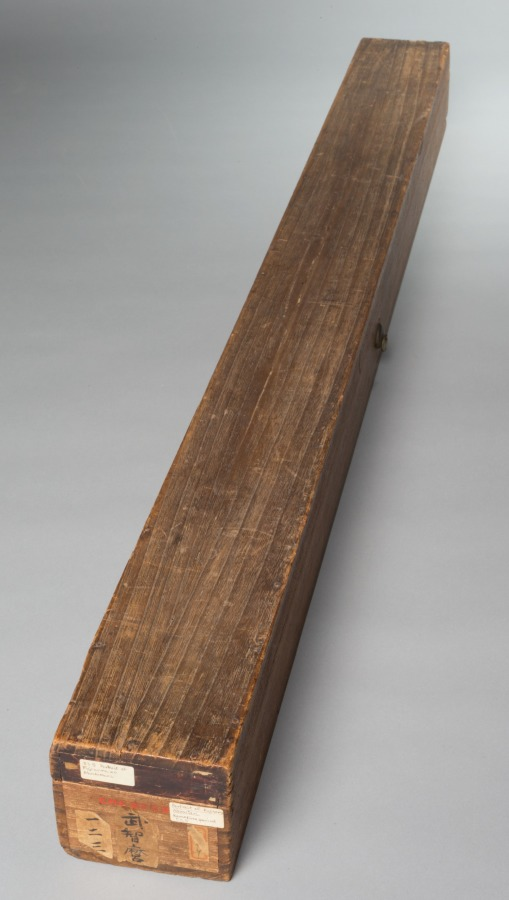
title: Fujiwara no Muchimaro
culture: Japan, Kamakura period (1185–1333)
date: 1200s or 1300s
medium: Hanging scroll; ink, color, gold, and cut gold on silk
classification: Painting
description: This portrait of Fujiwara no Muchimaro (680–737), a grandson of Fujiwara no Kamatari (614–669), includes an image of Buddha Dainichi Nyorai above his head. By situating the image of Dainichi there, this painting would seem to assert that Muchimaro is an avatar of Dainichi. In the same way that kami could be identified with Buddhist counterparts, powerful humans could also be seen as manifestations of Buddhist deities. A similar painting is at Eizanji in Nara, of which Muchimaro is known as the founder. It was once a branch temple of Kōfukuji, the Fujiwara family temple.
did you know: The boughs of wisteria appearing in the background symbolize the figure's status as a Fujiwara family member.